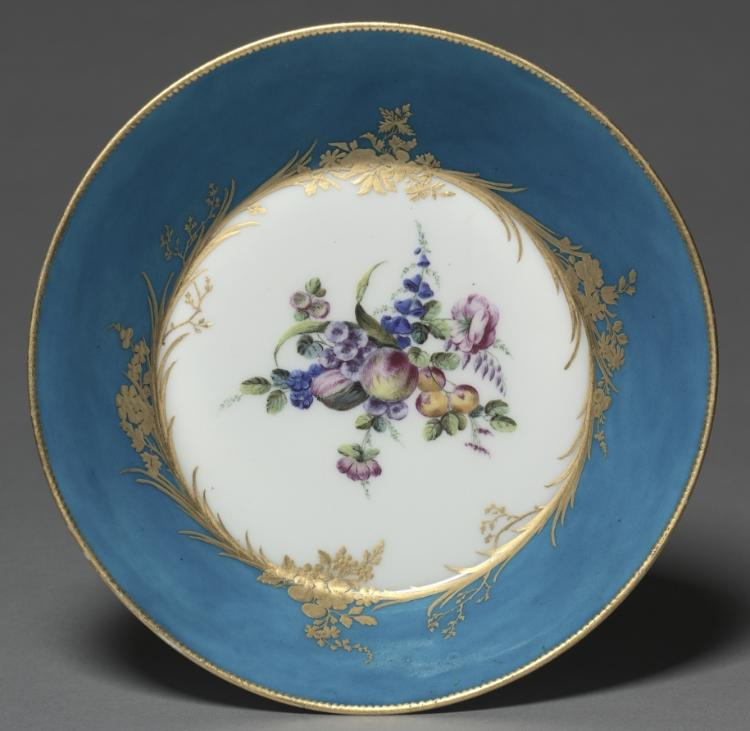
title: Saucer (Soucoupe)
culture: France, Vincennes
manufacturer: Vincennes Porcelain Factory (France, 1740–56)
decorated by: probably by Jean Jacques Siou (French)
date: 1753–54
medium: Soft-paste porcelain with enamel and gilt decoration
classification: Ceramic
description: The rich turquoise ground of this plate was known as bleu céleste (celestial blue) and introduced at the Vincennes factory in 1753. The deep color was achieved by repeated applications of the powdered pigment and multiple firings, which made it difficult for factories to achieve a smooth, even-toned color. Objects decorated with this color through this complicated process were among the most expensive items produced.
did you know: This color was famously used on a 1,749-piece dinner service made for the French king Louis XV in 1753.